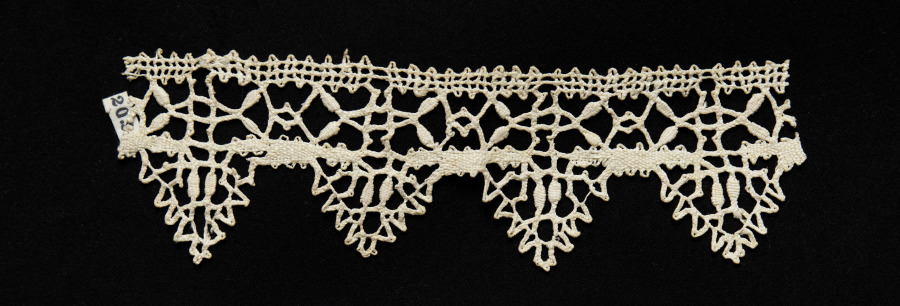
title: Lace Edging of Points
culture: Italy, Genoa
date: 1550–99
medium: Bobbin lace (needle lace, reticella design)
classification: Lace